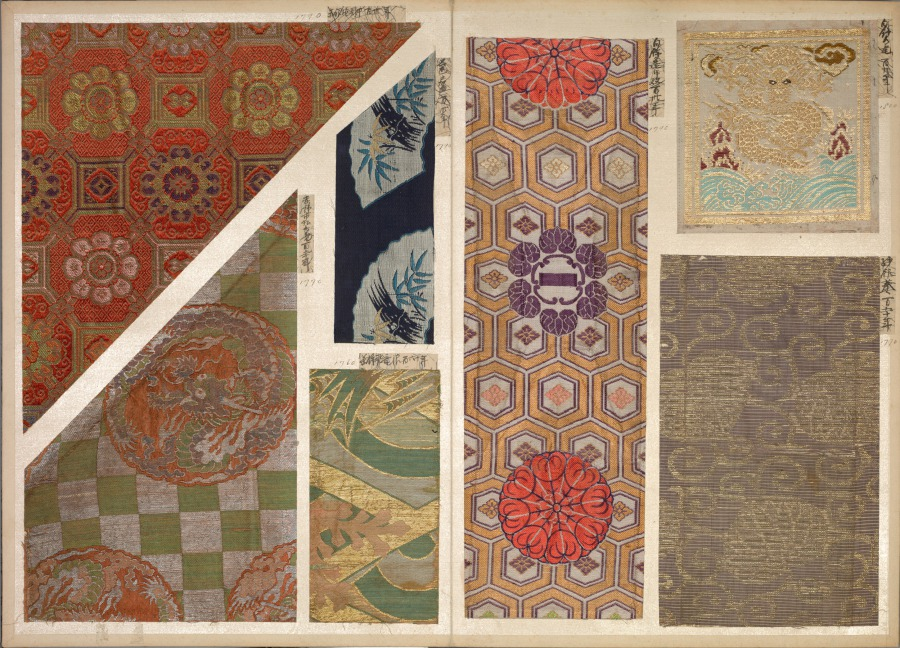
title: Album of Textile Samples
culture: Japan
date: 1790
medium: silk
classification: Textile